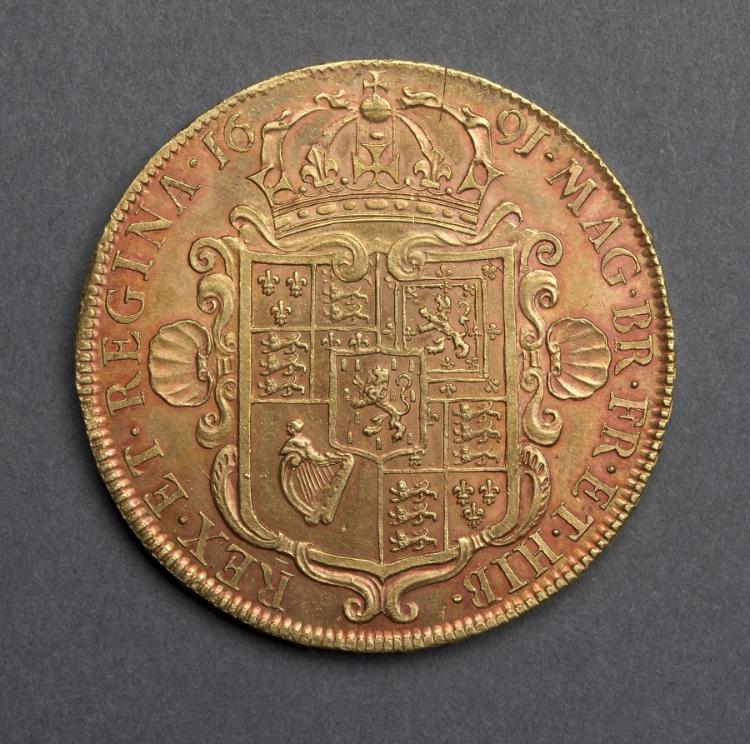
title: Five Guineas: Crowned Shield of Arms (reverse)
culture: England, William and Mary, 1688-1694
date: 1691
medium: gold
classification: Coins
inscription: MAG . BR . FR . ET . HIB . REX . ET . REGINA . 1691 .